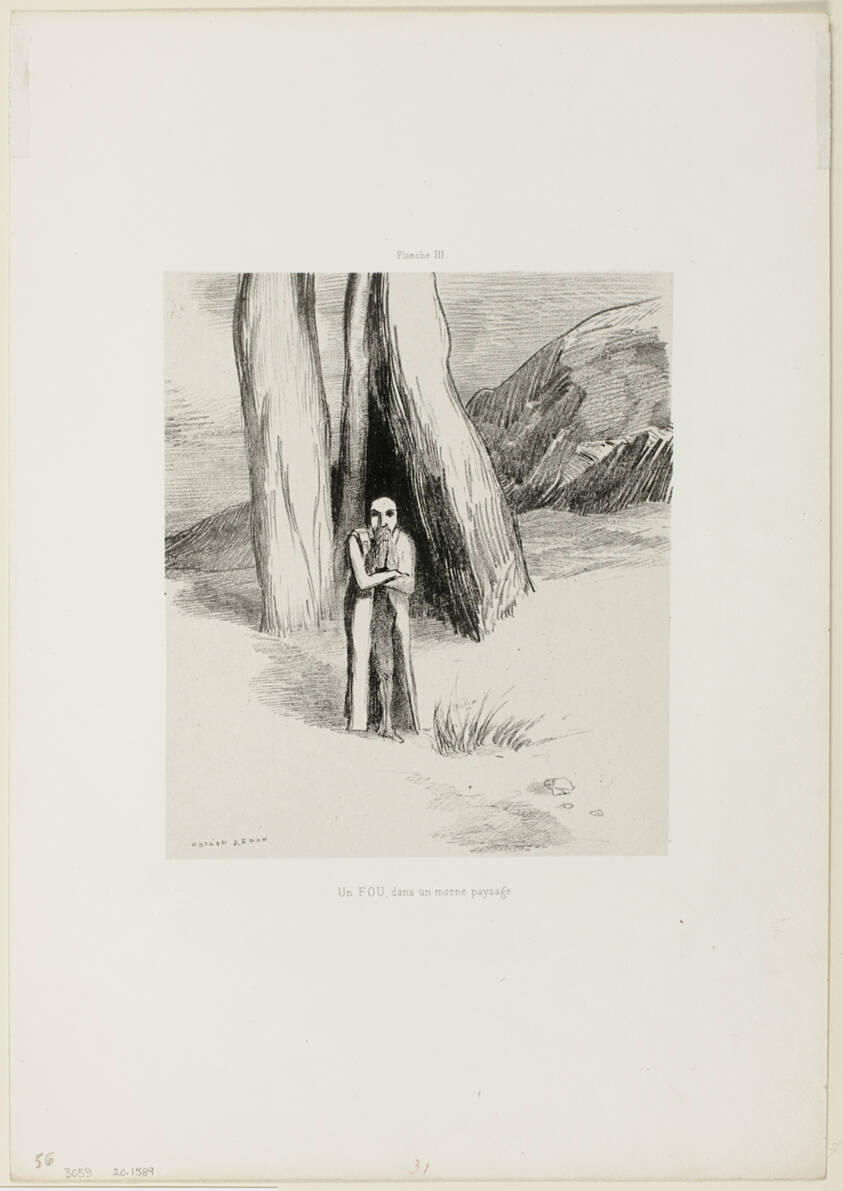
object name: Print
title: A Madman in a Dismal Landscape, plate 3 of 6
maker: Odilon Redon (French, 1840-1916)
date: 1885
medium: Lithograph in black on ivory China paper laid down on ivory wove paper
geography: France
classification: lithograph; print; prints and drawing; paper